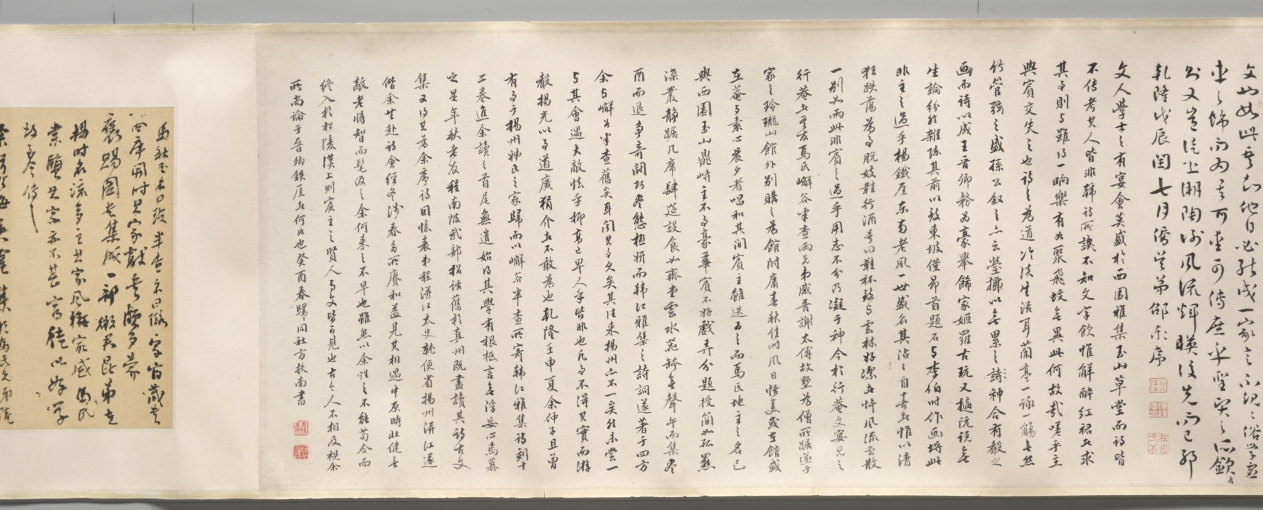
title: The Ninth Day Literary Gathering at Xing’an [Temporary Retreat]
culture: China, Qing dynasty (1644-1911)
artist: Fang Shishu (Chinese, 1693–1751)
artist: and Ye Fanglin (Chinese, active late 1600s–mid-1700s)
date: 1743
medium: Handscroll; ink and color on silk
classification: Painting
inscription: Fang Shishu's seal at beginning of painting: Ou ran shi de 偶然拾得. Ye Fanglin's seal at end of painting: Fanglin 芳林. Frontispiece title dated 1743 and 3 seals of Chen Bangyan 陳邦彦 (1678-1752).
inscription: 行庵在揚州北郭天寧寺西隅，馬君嶰谷半槎兄弟購僧房隙地所築，以為游息之處也。寺為晉謝太傅別墅。西隅饒古木，䨴鬱陰森，入林最僻，不知其近郛郭。庵居其中，無斲礱髤采之飾，惟軒庭多得清蔭，來憩者每流連而不能去。乾隆癸亥九日，積雨既收，風日清美，遂約同人，咸集於斯，中縣［懸］仇英白描陶靖節像，采黃花，酌白醪為供，乃以人世難逢開口笑，菊花雖插滿頭歸分韻賦詩。陶陶衎衎，觴詠竟日。既逾月，吳中寫真葉君敬［震］初適來，群貌小像，合為一卷，方君環山補景，命曰九日行庵文讌圖。裝池成，將各書所作於後，而囑鶚為之記。記按圖中共坐短榻者二人：右箕踞者，為武陵胡復齋先生期恆；左抱膝者，為天門唐南軒先生建中也。坐繩床者二人：中手牋者，歙方環山士庶；左仰首如欲語者，江都閔玉井華也。一人坐藤塾捻髭者，鄞全謝山祖望也。一人倚石坐若凝思者，臨潼張漁川四科也。樹下二人：離立把菊者，錢唐厲樊榭鶚；袖手者，錢唐陳竹町章也。一人憑石床坐撫琴者，江都程香溪先生夢星也。聽者三人：一人垂袖立者，祁門馬半查曰璐；二人坐瓷塾，左倚樹、右跂腳者，歙方西疇士疌 、汪恬齋玉樞也。二人對坐展卷者，左祁門馬嶰谷曰琯，右吳江王梅沂藻也。一人觀者，負手立於右，江都陸南圻鐘輝也。從後相倚觀者一人，歙洪曲溪振珂也。童子種菊者三人：樹間侍立者一人，撰杖、執卷者各一人。其植有蕉、有竹，又有雜樹，作丹黃青碧之色，紀時也。夫重九佳名，舉俗所重，而高常侍歎獨坐而搔首，陸天隨感登高以剫門，無其時地與人耳。今吾儕幸生太平，遇勝地，又皆素心有文之侶，固人世不可多得之會；而此十六人者，或土斷，或客游，聚散不常。異日者，歲月遷流，撫節物以有懷，一披此圖，悅如晤對。將來覽者，或亦不異此意乎。甲子夏五十有四日厲鴞記並書。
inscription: 揚州為江北大都會，居民連甍接楹，笙歌輿從，竟日喧聚，其於淸歌雅集，葢罕矣。城北天寧寺，為晉謝公駐節時所游息，其中有行庵，吾友馬君嶰谷、半查兄弟之小築也。地不踰五畝，而老樹古藤，森蔚相望，皆千百年物，間以修竹，春鳥秋蟲，更唱迭和，其間曲廊高榭，位置閑適。出門未數百步，即黃塵濁流極目，令人作惡。而此中獨蕭然有人外之思。乾隆八年九日，嶰谷兄弟招集同社一十四人祀陶公，出所藏仇實父白描像懸於閣上，各賦一詩。予方留滯西泠，未得預也。又踰旬而予至，諸君方擬繪圖記事，嶰谷曰：是不可無君。乃以展日更舉，令予得陪卷軸之末；而洪君曲溪，兩度皆以病失約，然故吟社中人也，亦補入焉。予太息謂諸君曰：謝公之風流，千古如在；然其游息於斯也，則與東山賓從之樂稍不同矣。公之為是行也，蓋以符氏之亂，思北定中原也。而其時公巳困於讒口，不自安於朝；雖在河朔極有可乘之會，而神明內索，徘徊不克自前。老師左次，竟無尺寸之功，坐失事幾。吾常過邵伯之埭，吊法雲之荒祠，未嘗不喟然累啼，以為明德之衰也。至若九日嘉名，陶公高格，固在羲皇懷葛之間；然而讀其 止酒之詩，蒼梧漢水之感，以瘦詞寄其孤憤則夫黃花白酒，蓋亦不得巳而漫與焉者。今吾輩生逢太平之日，書淫墨癖，是處留連，胸次中了無一事，為江湖之幸民，論人雖甚媿，論其時與地，則不可不私相慶也。諸君曰：善。圖之詳巳見於厲君樊榭記中。予之許為嶰谷兄弟序斯圖也，三年於茲；今夏重披圖捉筆，而唐丈南軒，巳化為異物矣。對酒當歌，人生幾何，願與諸君並日相遇從焉。丙寅夏杪孤山社小泉翁全祖望序。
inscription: 6 additional colophons and 15 additional seals: 1 colophon, dated 1746, and 1 seal of Huang Zhijun 黃之雋 (1668-after 1746); 1 colophon and 2 seals of Zha Xiang 查祥 (1718 jinshi); 1 colophon, dated 1746, and 3 seals of Zhang Siwen 張思問; 1 colophon, dated 1748, and 4 seals of Shao Dong 卲東 (1721 jinshi); 1 colophon, dated 1753, and 2 seals of Fang Shiju 方世舉 (signing as Fang Funan 方扶南); 1 colophon, dated 1808, of Ruan Yuan 阮元 (1764–1849); 3 seals unidentified.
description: By the 1700s, Yangzhou was flourishing both economically and culturally as the most prosperous city in China, having surpassed all other Jiangnan cities in their creation of gardens. This group portrait commemorates a literary gathering in the private garden of the salt merchants and art patrons Ma Yueguan (1688–1755) and his brother Ma Yuelu (1697–after 1766) in Yangzhou. Ma Yueguan received imperial recognition for providing financial aid and food relief for those affected by flood and drought. Ma Yueguan is seen seated at the end of the painting holding an open scroll while Ma Yuelu stands behind the qin instrument player. Among the guests were officials, scholars, poets, painters, and merchants, a mix of local members of a poetry club reflecting increasing social diversity.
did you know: The two hosts and their fourteen guests were all officials, scholars, poets, painters, and salt merchants.